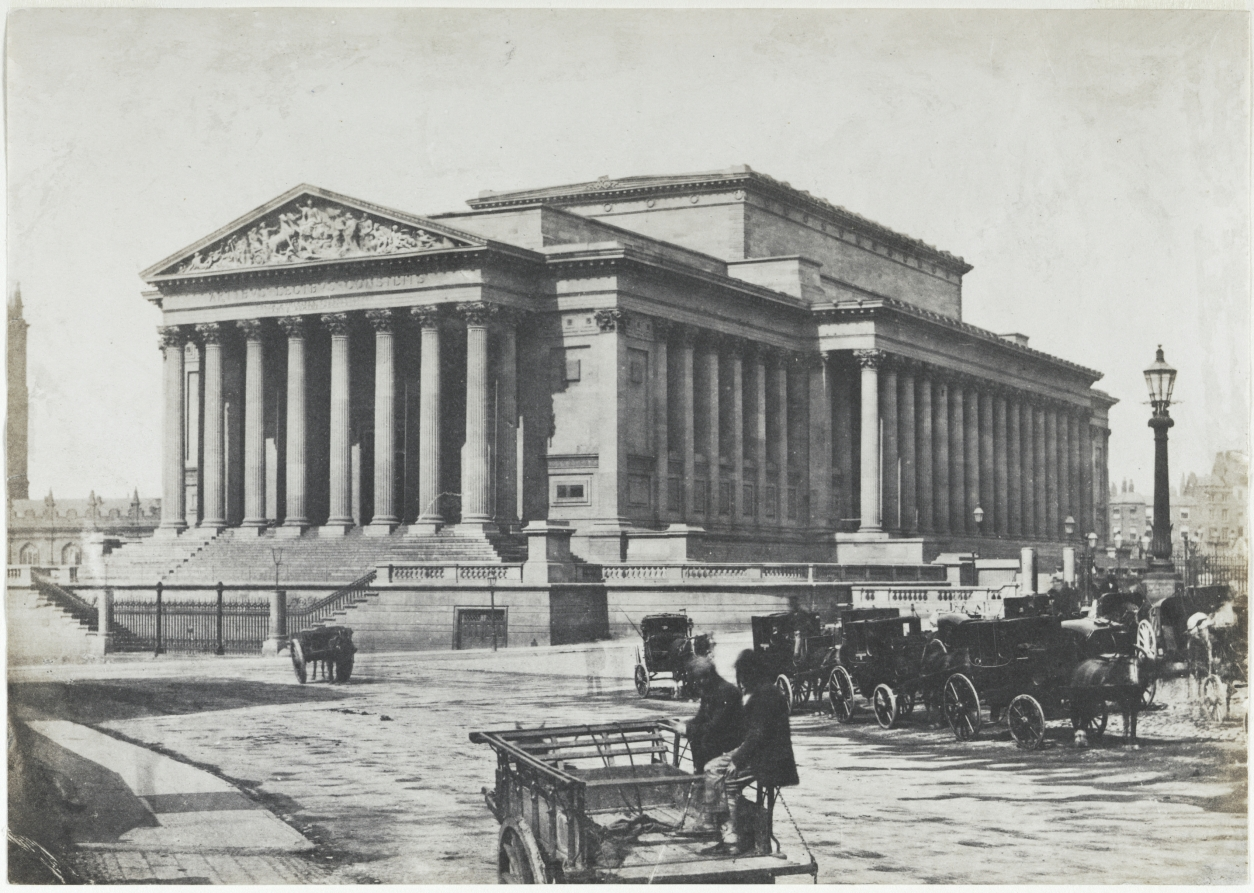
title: St. George's Hall, Liverpool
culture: England, 19th century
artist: Thomas Sutton (British, 1819–1875)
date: 1854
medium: salted paper print from a paper negative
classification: Photograph